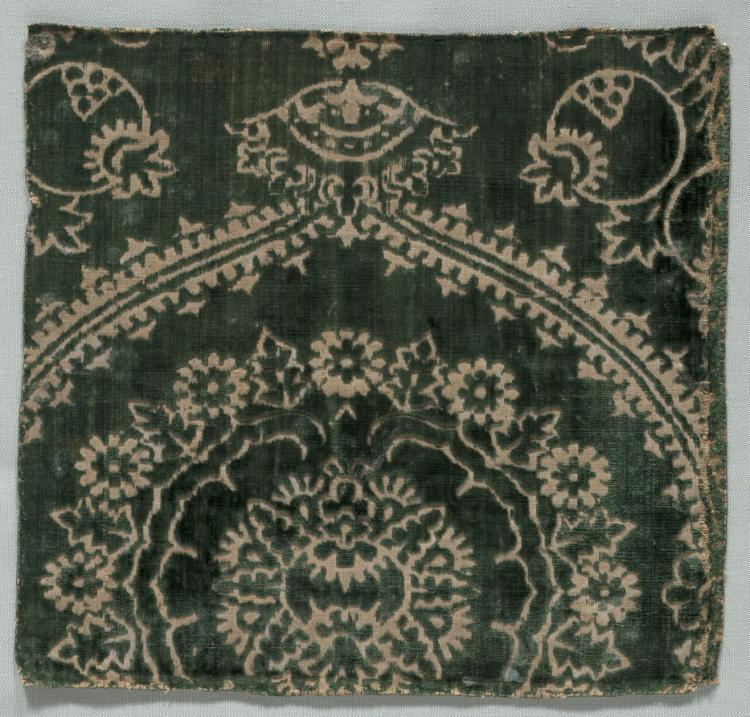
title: "Ferronnerie" Velvet Fragment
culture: Italy, 15th century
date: 1400s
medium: velvet (cut and voided)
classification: Velvet